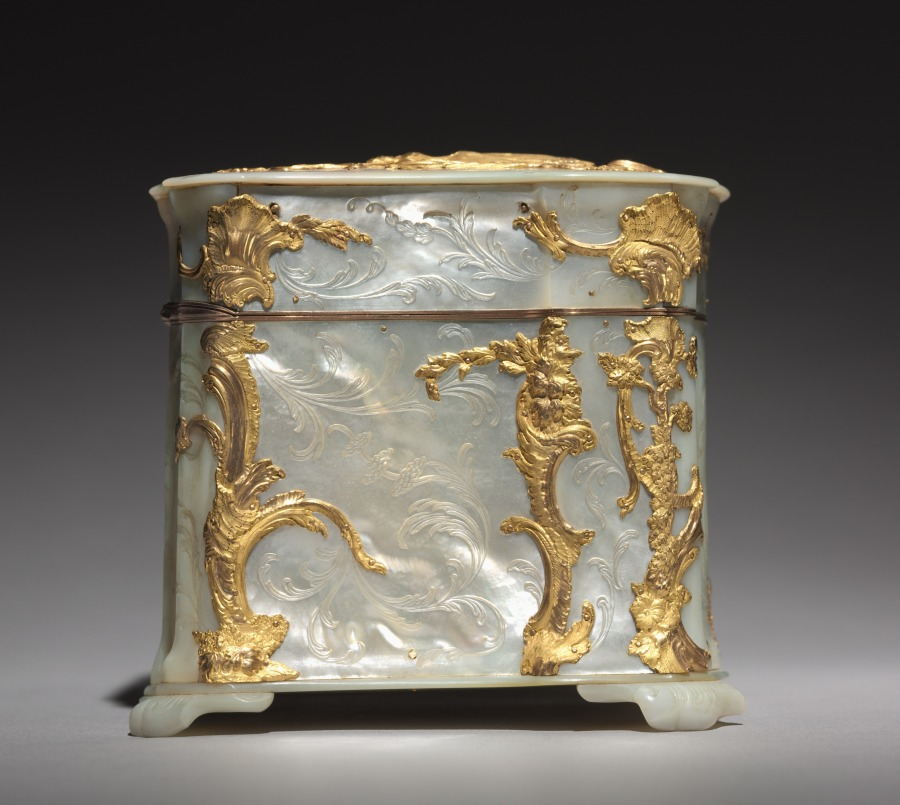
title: Sewing Box with Implements (Nécessaire)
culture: Austria, possibly Vienna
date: c. 1765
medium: gold and mother-of-pearl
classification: Miscellaneous